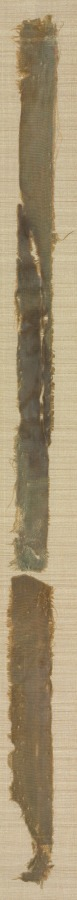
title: Vajrapani Embroidered Mount with Garuda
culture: China and Tibet, Embroidery: China, Yuan dynasty (1279-1368); painting: Tibet, 17th century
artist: Choying Dorje, the Tenth Black Hat Karmapa (Tibetan, 1604–1674)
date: painting 1600s, embroidery c. 1300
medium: Opaque watercolor, gold, and silver on silk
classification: Embroidery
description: The painting depicts the Buddhist protector who holds (pani) the thunder bolt (vajra) in his right hand. He kneels in reverence and holds his left hand in a gesture of salute. This unusual image appears to have been the vision of a Tibetan monastic patriarch known for creating his own inventive paintings and sculptures. Sewn to the painting are Chinese damask borders and rare embroideries dating to the Chinese Yuan dynasty (1279–1368). They depict man-eagle figures known as Garuda, a form occasionally assumed by Vajrapani.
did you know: Vajrapani sometimes takes the form of Garuda, enemy of snakes.